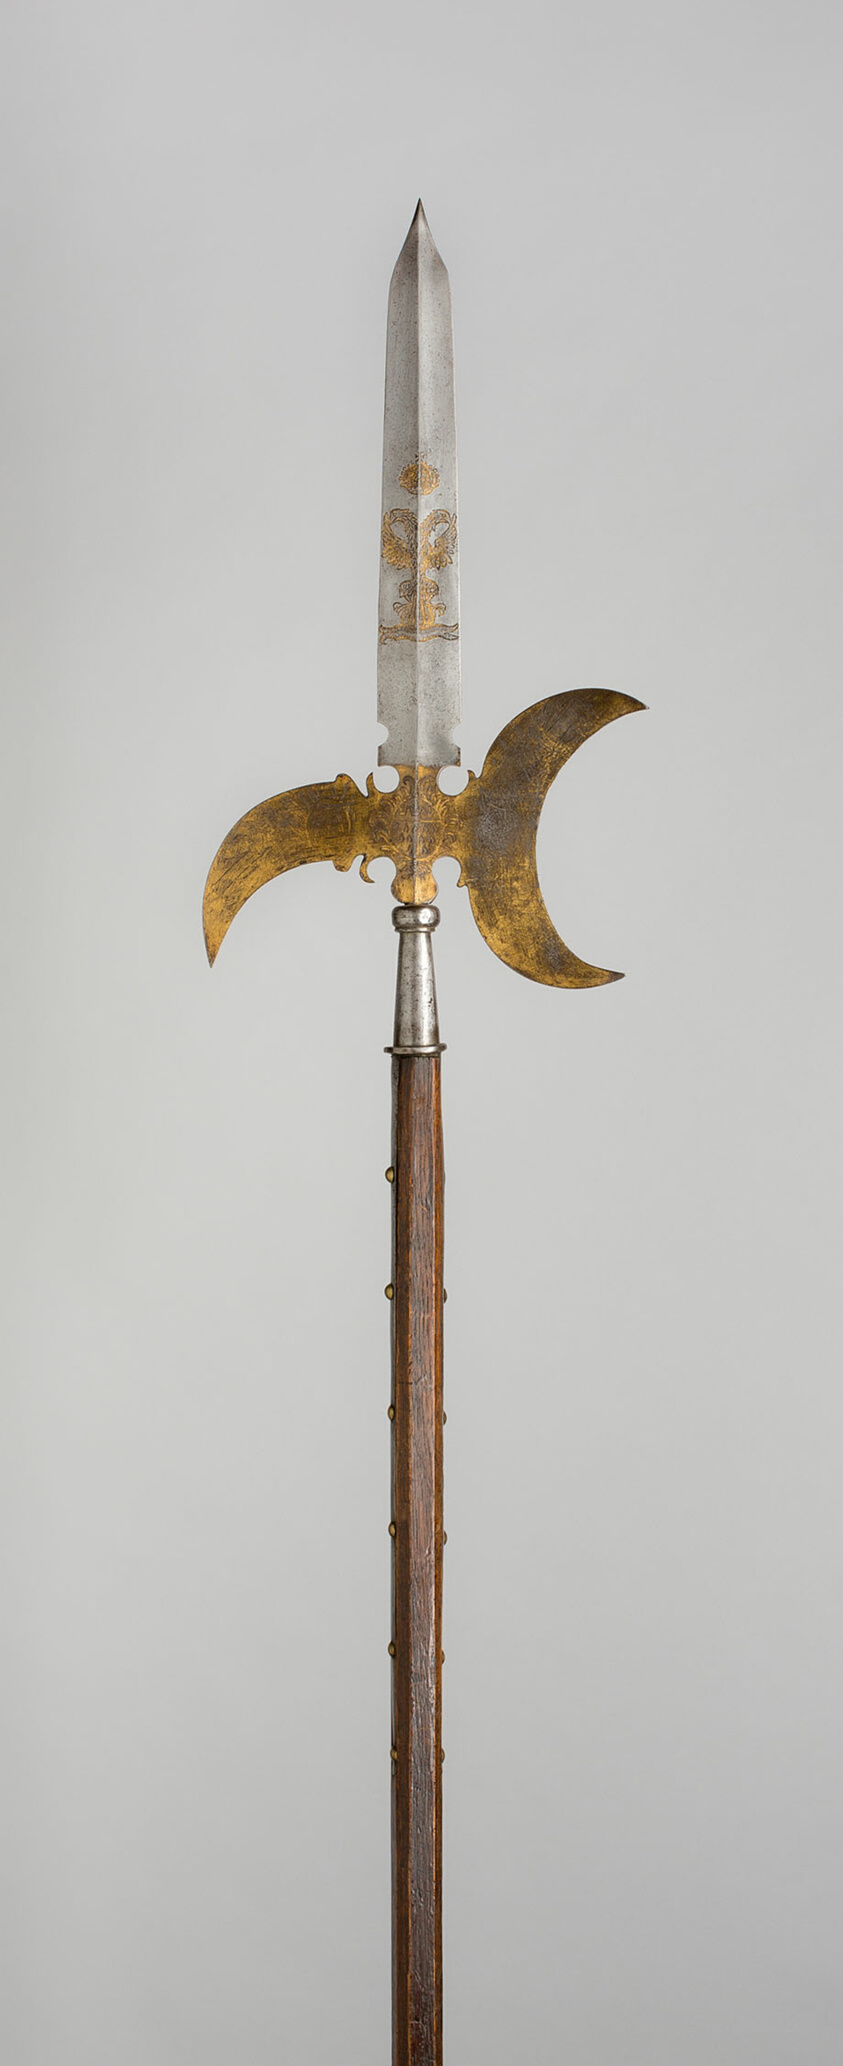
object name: Arms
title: Halberd for the Civic Guard of Cologne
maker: German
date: c. 1700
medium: Steel, brass, gilding, and wood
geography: Germany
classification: edged weapon-staff; arms; arms and armor